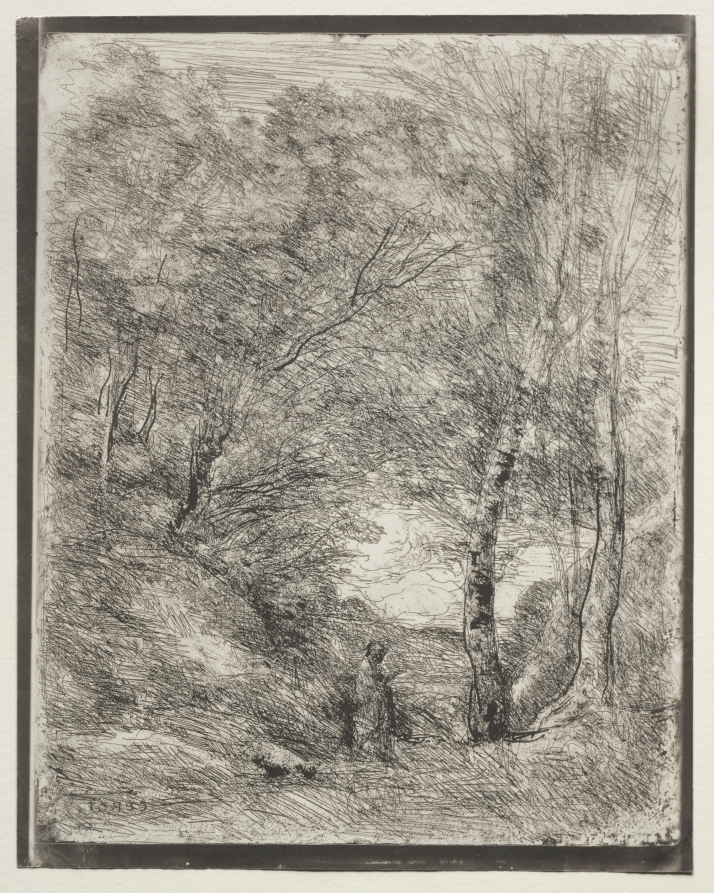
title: The Gardens of Horace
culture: France, 19th century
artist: Jean Baptiste Camille Corot (French, 1796–1875)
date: original impression 1855, printed in 1921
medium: cliché-verre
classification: Print